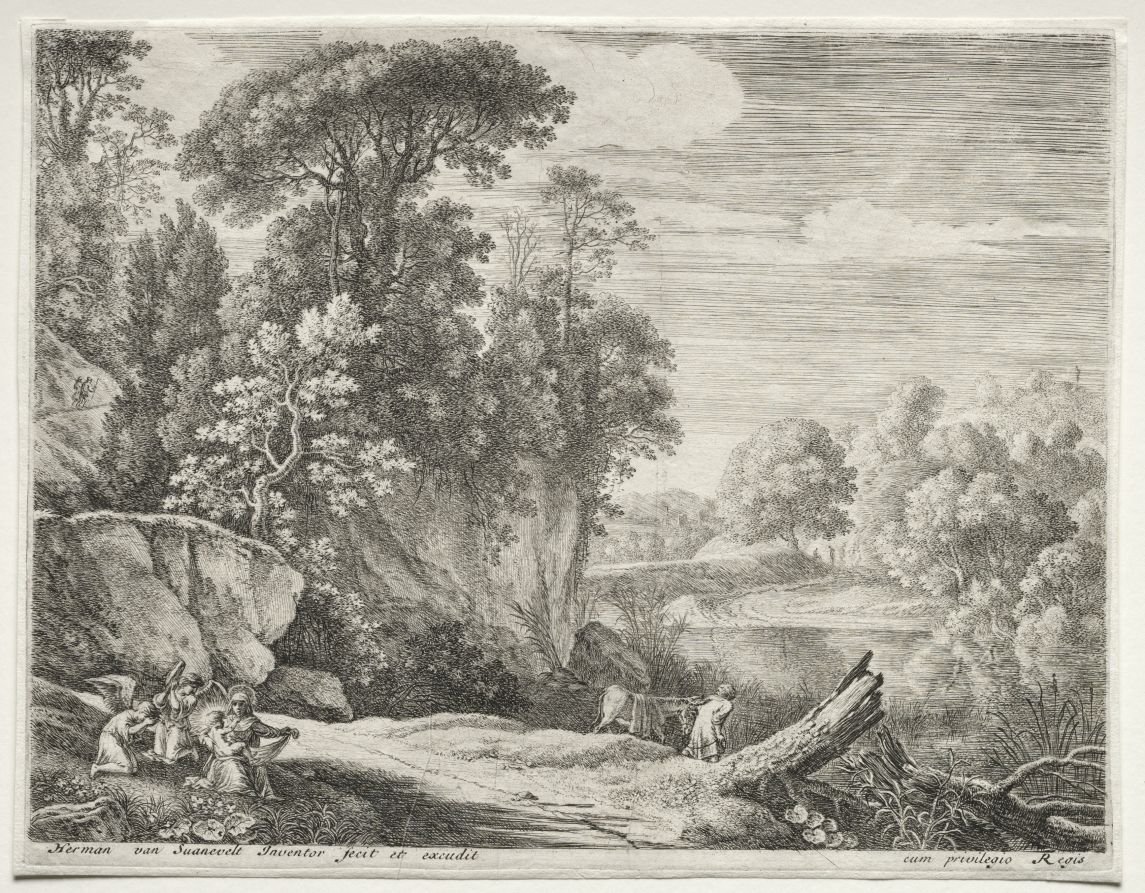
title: The Donkey Led to the River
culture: Netherlands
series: The Flight into Egypt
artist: Herman van Swanevelt (Dutch, c. 1600–1655)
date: c. 1652–54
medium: etching and engraving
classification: Print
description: This series by Herman Swanevelt, The Flight into Egypt, illustrates an event from the New Testament of the Bible. Joseph, Mary, and Christ fled into Egypt to escape King Herod's persecution. Traditionally represented as a single image, Swanevelt enlarged the story into four scenes. The Holy family is first shown traveling with three angels behind them, then Joseph helps Mary off the donkey, next Joseph leads the donkey to water as Mary changes the child, and finally the family is at rest. However, the main focus of each of these prints is the depiction of landscape, a genre that reached unprecedented levels of popularity during the 1600s. The scenery, looking much more like the Italian countryside than Egypt, was inspired by Swanevelt's paintings. Although he was Dutch, he spent most of his career in Paris and Rome. As a painter, he was known for his ability to convey warm, glowing sunlight, a quality also found in his etchings.